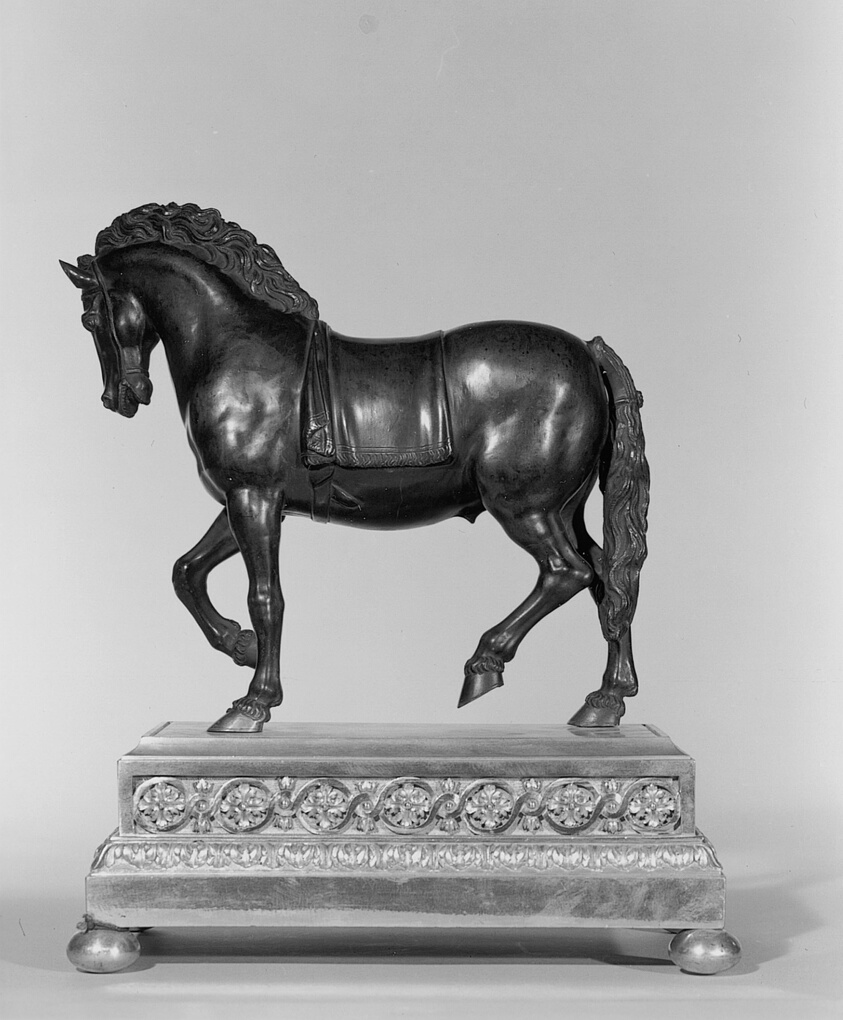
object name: Sculpture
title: Pacing Horse (one of a pair)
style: sixteenth century, 16th Century, 17th Century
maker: After a design by Giambologna (Italian, born Flanders, 1529–1608)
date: Modeled c. 1587, cast 1600/50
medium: Bronze with gilding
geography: Italy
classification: statuette; sculpture; figure; Italian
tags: horse, animals, equestrian, horses, statues